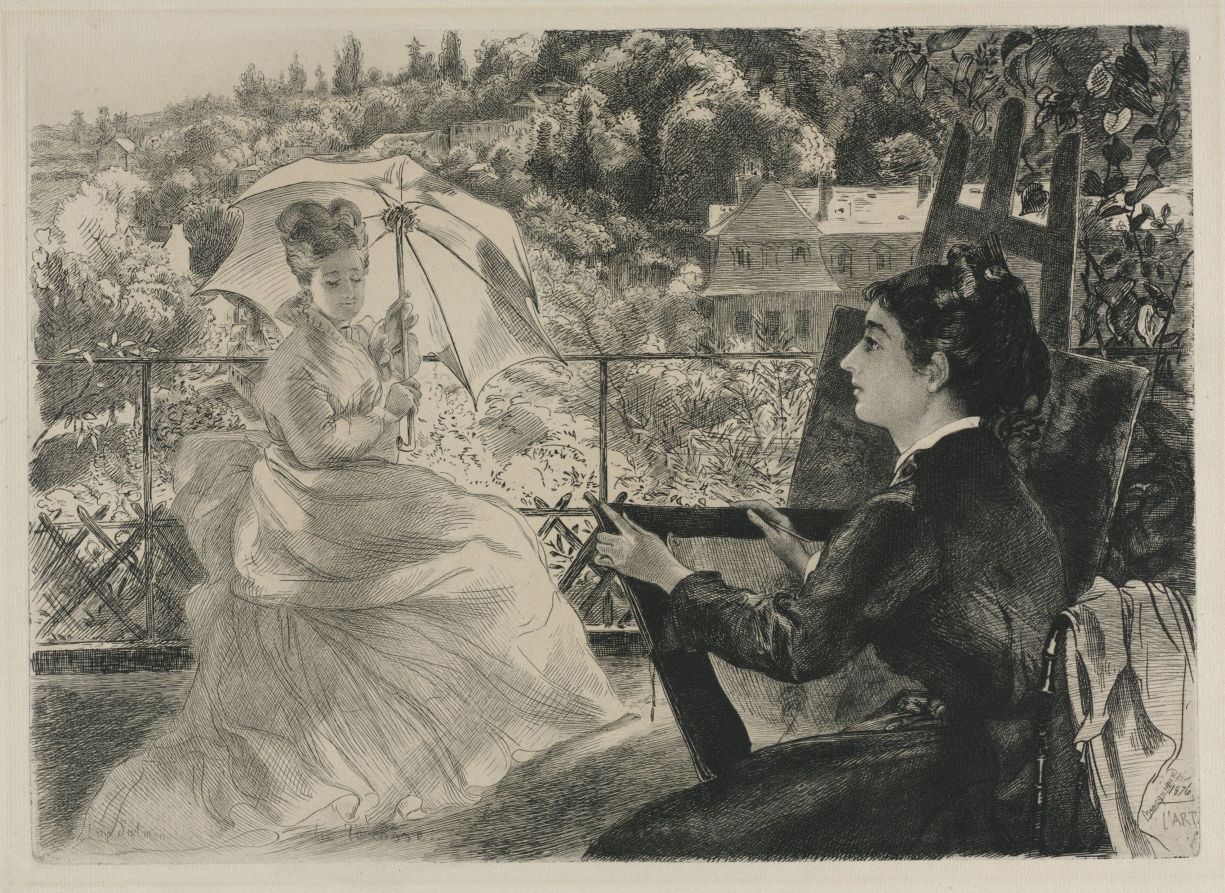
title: The Terrace of the Villa Brancas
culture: France, 19th century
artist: Félix Bracquemond (French, 1833–1914)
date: 1876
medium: etching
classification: Print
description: Here, two women are seated on a sunny terrace in the lush landscape at Sèvres. One figure, presumably Bracquemond's wife, Marie, who was also an artist, draws the other, who is posed with an umbrella. The old porcelain manufactory and part of Bellevue is visible among the trees. The artist is alert and active, a pencil poised in her right hand, while the subject of her portrait demurely casts her gaze downward. Here, the 19th-century woman is depicted both in the midst of creating a work of art, and as the passive subject of one.